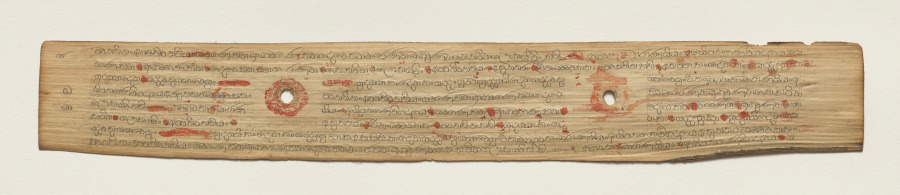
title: Leaf from a Buddhist Manuscript (recto)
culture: Sri Lanka, Singhalese, Late 17th century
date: c. 1700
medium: fiber paper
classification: Manuscript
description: Palm leaf material is still used for manuscripts in Sri Lanka. The palm leaves are prepared first by boiling them, drying them in the sun, and then rubbing them with oils. Scribes then use a metal stylus to incise the text. Then charcoal powder is wiped across the pages, filling in only the inscribed lines.